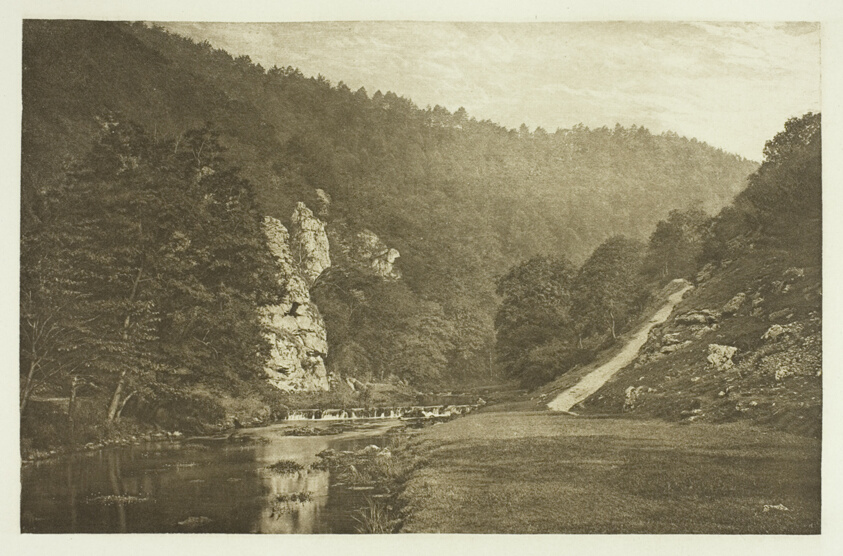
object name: Photograph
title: In Dove Dale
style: 19th century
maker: Peter Henry Emerson (English, born Cuba, 1856–1936)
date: 1880s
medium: Photogravure, plate XXXIX from the album "The Compleat Angler or the Contemplative Man's Recreation, Volume II" (1888)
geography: England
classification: photogravure; photomechanical process; photography; photograph